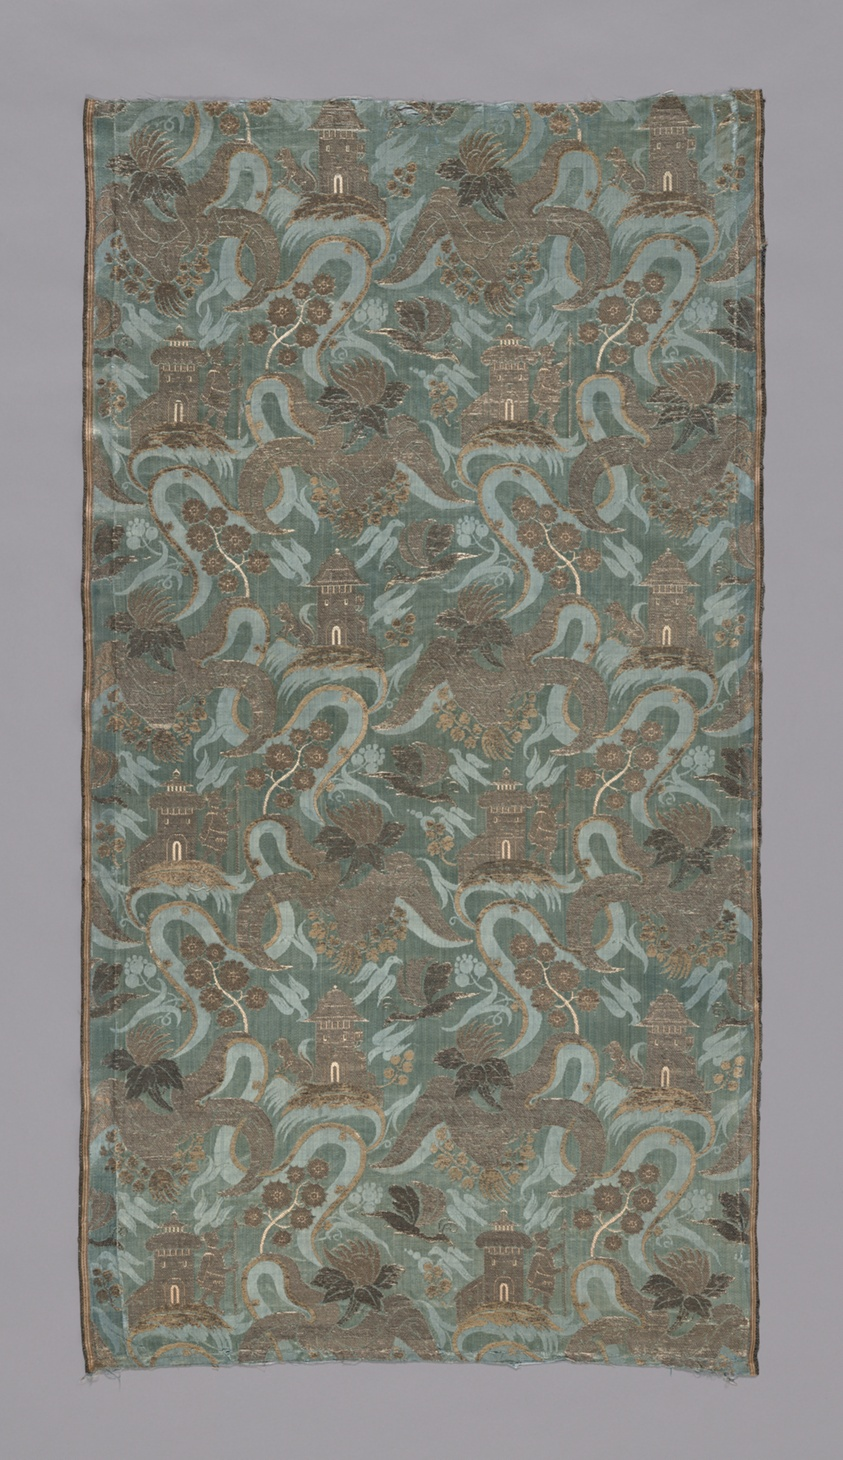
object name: Textile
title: Panel (Dress Fabric)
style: qing, chinoiserie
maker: China, Possibly Macao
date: Qing dynasty (1644–1911), 1701/1800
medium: Silk, gilt-metal-strip-wrapped silk, warp-float faced 7:1 satin weave with supplementary brocading wefts and self-patterned complementary ground weft floats and areas of plain interlacing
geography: China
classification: textile; weaving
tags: flowers, foliage